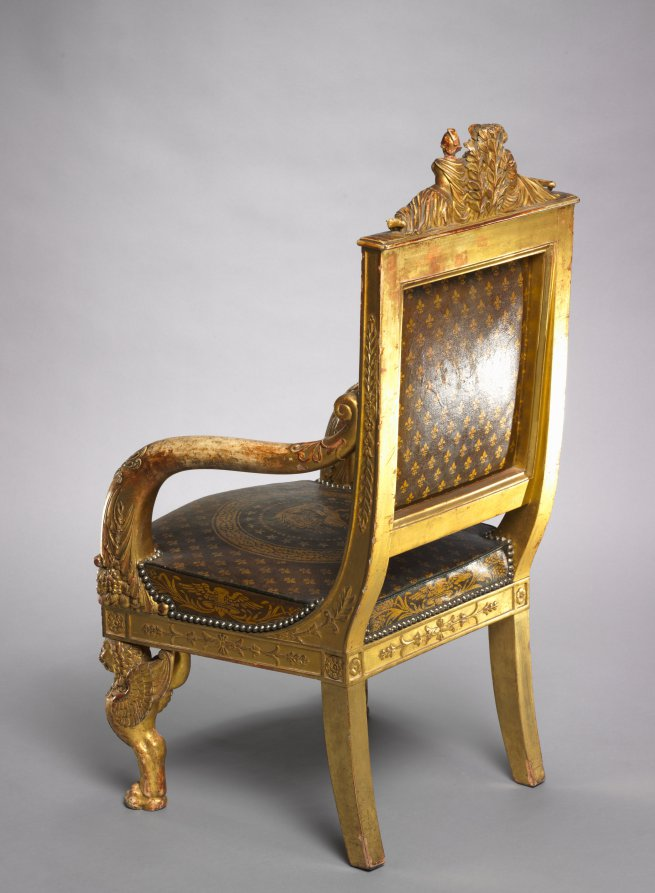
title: Child's Throne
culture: France, Paris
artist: Pierre-Marie Balny le Jeune (French, 1832)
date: 1822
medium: carved and gilded wood, leather upholstery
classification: Furniture and woodwork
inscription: inscribed with stencils inside back rail: BLONDEL TAPISSIER/RUE ST. ANTOINE N 72 1822 inscribed in ink lower edge back rail: 12 JANVIER 18[22?]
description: This chair was made for the young, presumed successor to the French throne who ruled briefly as Henri V in 1830, the last of the direct Bourbon line. He is depicted at the center of the top rail protected by female figures representing France and Minerva, the Roman goddess of wisdom. Fleurs-de-lis and the Gallic rooster, symbols of French royalty and the French people, decorate the upholstery.